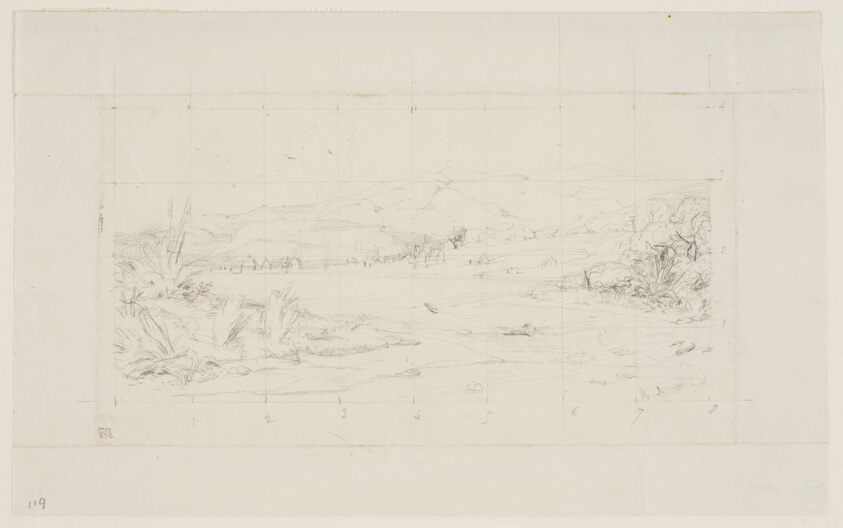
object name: Drawing and Watercolor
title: The Little French Colony at Akaroa, 1845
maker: Charles Meryon (French, 1821-1868)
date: 1865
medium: Graphite on ivory wove paper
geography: France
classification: graphite; drawings (visual works); prints and drawing